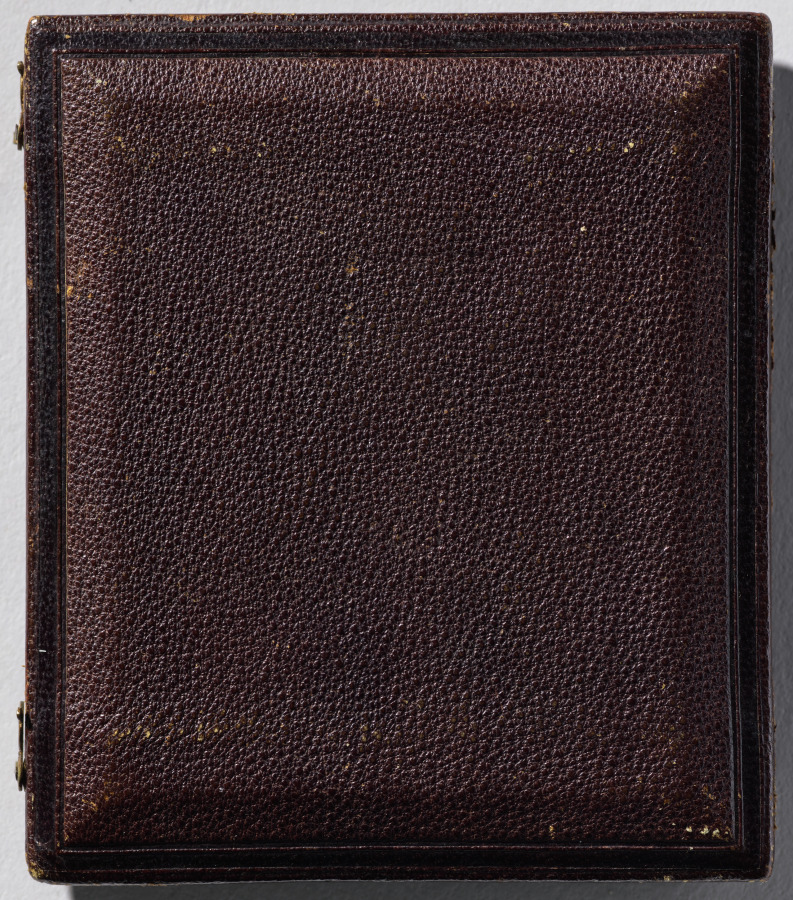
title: Alice Montgomery (1850-1917)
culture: America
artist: Enoch Long (American, 1823–1898)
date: 1850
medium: daguerreotype, applied color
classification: Photograph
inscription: Written in black ink on enclosed paper: "Alice Montgomery / 1850-1917"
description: Children have always been particularly cherished subjects for photography. Portraits were made to preserve the memory of their stages of growth and, in an age when long-distance travel was rare, to share with faraway relatives. And, for a sadder reason: in 1840 an estimated one-third of children died before age five. Photography offered grieving parents the opportunity to immortalize their children’s features. This tragic genre of photographs, later called “post-mortems,” often depicts the children in fine clothing, laying down with eyes shut, as if merely napping.